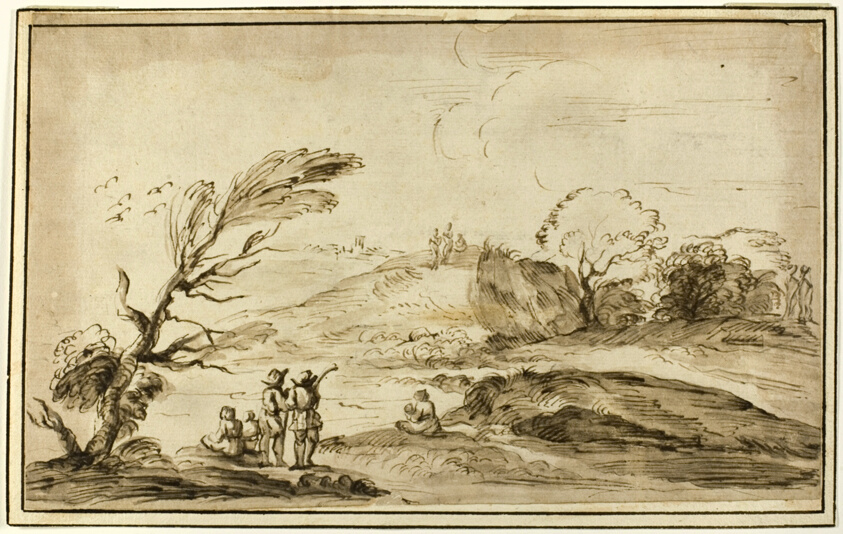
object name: Drawing and Watercolor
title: Two Groups of Figures in a Landscape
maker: after Giovanni Francesco Barbieri, called Guercino; Italian, 1591-1666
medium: Pen and brown ink, with brush and brown wash, over traces of black chalk, on ivory laid paper, tipped onto ivory laid paper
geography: Italy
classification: pen and ink drawings; drawings (visual works); prints and drawing